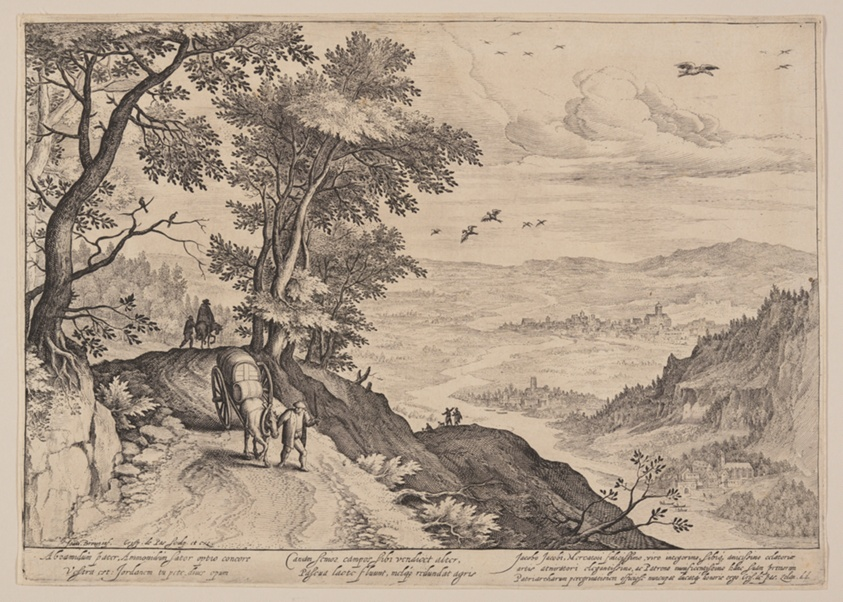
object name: Print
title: Vast Landscape with Coach Driver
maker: Crispijn van de Passe I (Dutch, c. 1565–1637); after Jan Brueghel (Flemish, 1564-1635)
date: c. 1600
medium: Engraving on ivory laid paper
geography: Netherlands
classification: print; paper; prints and drawing; engraving